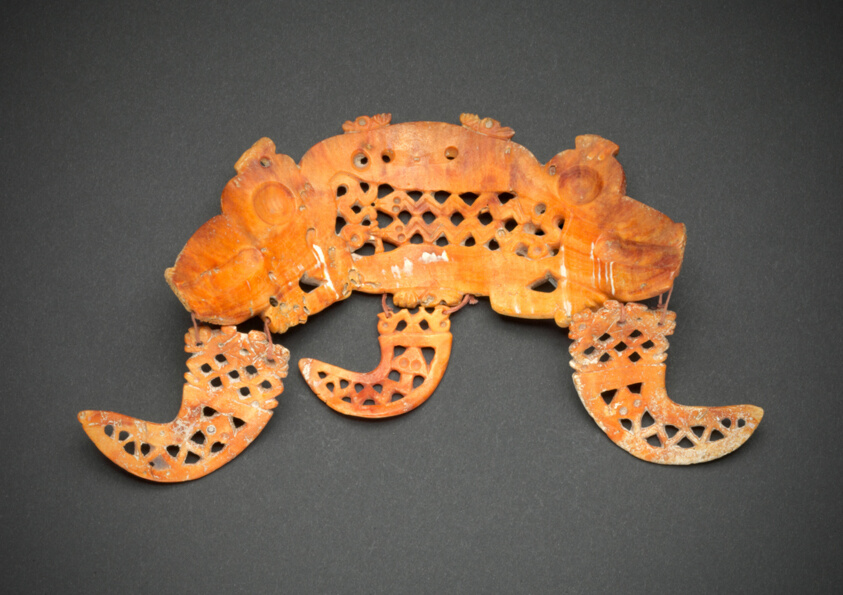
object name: Costume and Accessories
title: Pendant in the Form of a Mythical Double-Headed Creature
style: colima, mesoamerican, Pre-Columbian, americas, jalisco, west mexico, Arts of the Americas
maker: Colima or Jalisco; Colima or Jalisco, Mexico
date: 200 BCE–200 CE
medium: Spondylus shell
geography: Western Mexico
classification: pendant (jewelry); shell; art of the americas; jewelry; costume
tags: jewelry, supernatural, water, shells